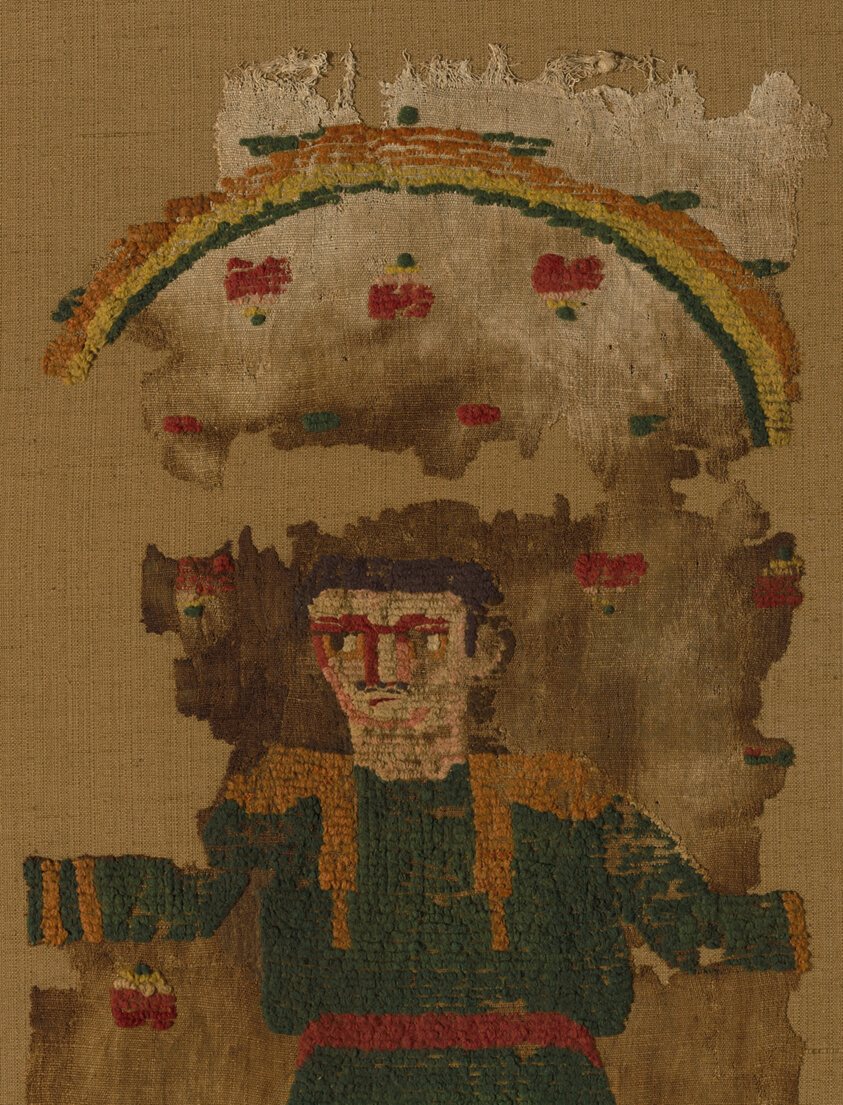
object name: Coverings and Hangings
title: Fragment (Hanging)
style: roman period (egyptian), coptic (period)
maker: Byzantine; Egypt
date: Roman period (30 B.C.– 641 A.D.), 5th/6th century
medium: Linen and wool, plain weave with weft uncut pile and embroidered linen pile formed by variations of back and stem stitches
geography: Egypt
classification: textile; weaving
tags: men, architecture, decoration, columns, arches